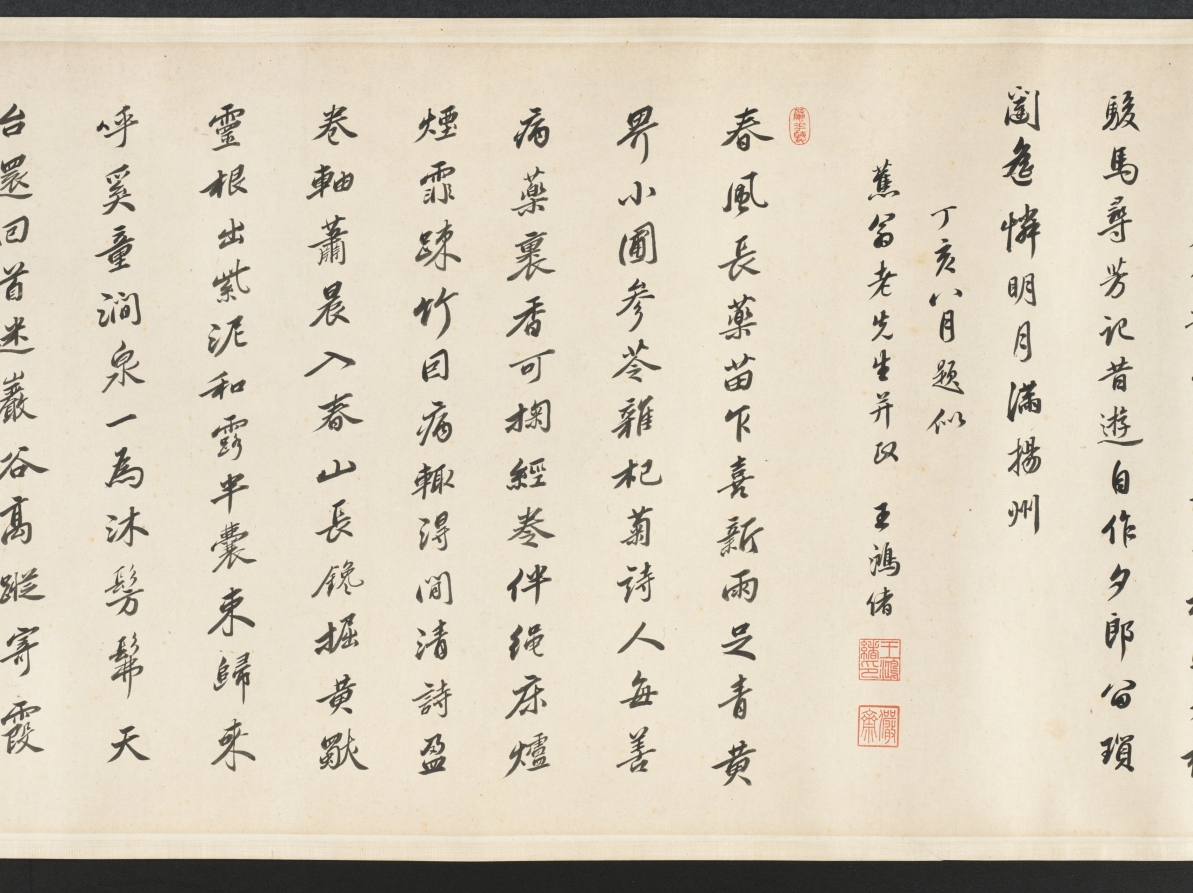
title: Cleansing Medicinal Herbs in the Stream on a Spring Day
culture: China, Qing dynasty (1644-1911)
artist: Yu Zhiding (Chinese, 1647–c. 1716)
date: 1703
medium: Handscroll; ink and color on silk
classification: Painting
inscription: Title by Chen Yixi.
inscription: 姑射仙人冰雪膚，新詩傳唱滿通都。/ 極知遲暮難為別，更展春泉洗藥圖。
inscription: Colophon by Chen Tingjing 陳廷敬 (1639–1712). Colophon by Wang Hongxu 王鴻緒 (1645–1723), dated 1707. Colophon by Song Luo 宋犖 (1634–1714). Colophon by Liu Yan 劉巗. Colophon by Jing Xikui 涇西夔. Colophon by Liu Yan 劉巗. Colophon by Cao Yin 曹寅. Colophon by Wang Shihong 汪士鋐. Colophon by Wang Shidan 王式丹 (1645–1718), dated 1712. Colophon by Shi Shenyi 史申義 (1661–1712), dated 1712. Colophon by Yin Yuqing 殷餘慶, dated 1712.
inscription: Colophon by Chen Shixia 陳時夏, dated 1729.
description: A famous portraitist, Yu Zhiding here depicts the likeness of Shi Shenyi 史申義 (1661–1712), an official and poet. Master Shi, a sickly man, was deeply interested in medicinal science. The opening section of the scroll features a boy washing a fungus in fresh spring water, a basket of medicinal herbs by his side. Other servants carry a fan, a bundle of scrolls, and a cup of tea or hot wine. Master Shi sits in a bamboo grove, surrounded by fields of herbs. Returning swallows, pink peach blossoms, and blooming magnolia indicate spring, whereas the fungus conveys wishes for long life. The spring theme may express the artist’s wish for his friend’s recovery.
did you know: In the pavilion are some of Shi Shenyi’s scholarly accoutrements: a stack of books, an antique zun 尊 (wine vessel), a brush holder, an ink stone, and a small chime.